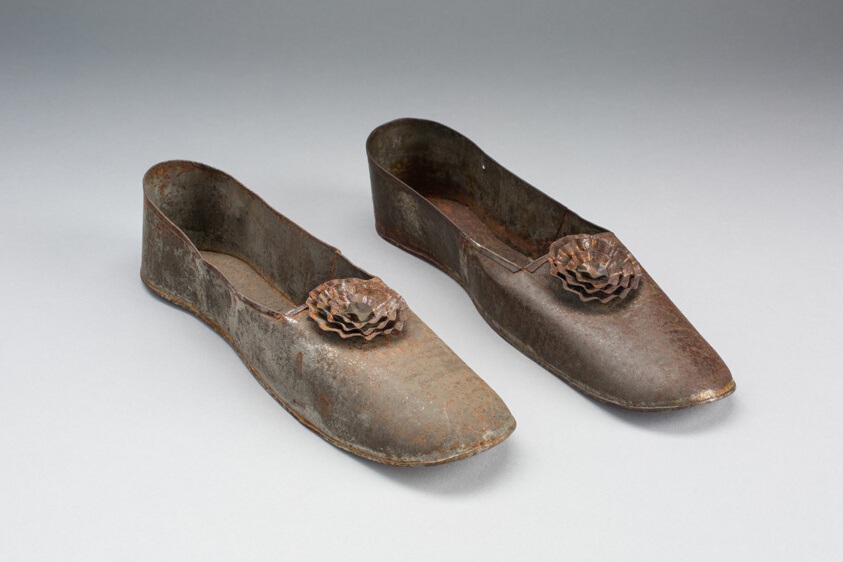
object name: Decorative Arts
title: Women's Shoes (Anniversary Tin)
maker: Artist unknown (American, 19th century)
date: 1850–1900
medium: Tin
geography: United States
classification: american arts; shoes; american decorative arts; decorative arts